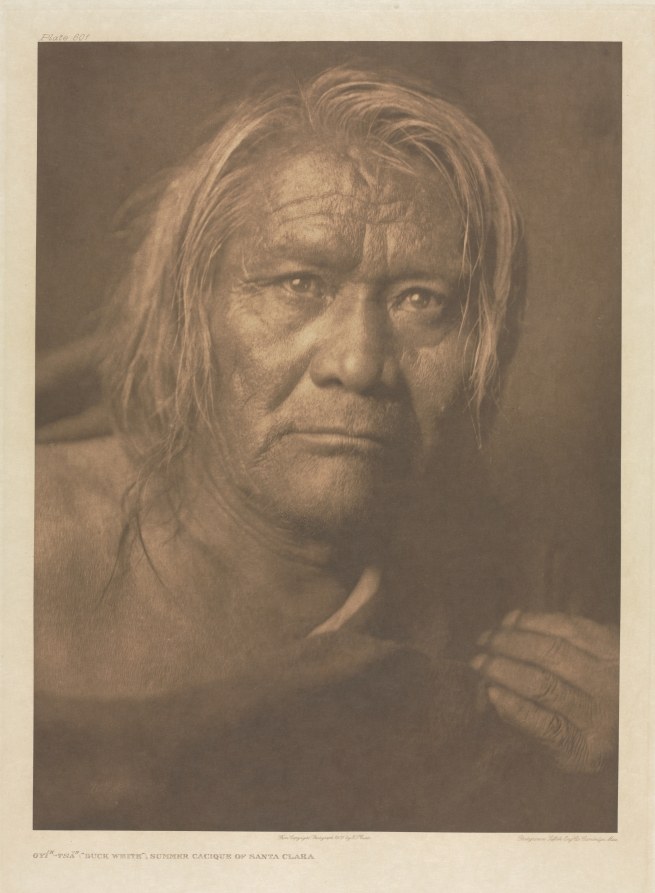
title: Portfolio XVII, Plate 601: Oyí-tsa ("Duck White"), Summer Cacique of Santa Clara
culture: America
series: The North American Indian: being a series of Portfolios picturing and describing the Indians of the United States, the Dominion of Canada, and Alaska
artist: Edward S. Curtis (American, 1868–1952)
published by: The University Press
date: 1905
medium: photogravure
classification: Portfolio